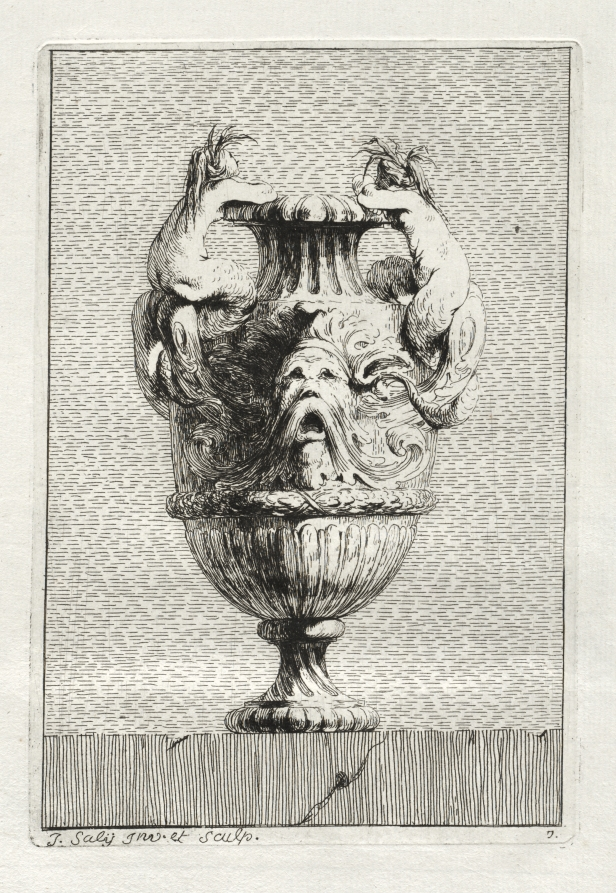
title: Suite of Vases: Plate 7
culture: France, 18th century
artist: Jacques François Saly (French, 1717–1776)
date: 1746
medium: etching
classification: Print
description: Designing ornamental vases or urns was particularly popular during the mid-18th century since the only limit to the possibilities was the imagination of the artist. Saly, a sculptor by training, was a student at the French Academy in Rome from 1740 to 1746, at which time he published a set of 30 etchings. Saly began with basic antique vase forms but deviated from classical ornament to use a rich variety of fantastic creatures for embellishment.